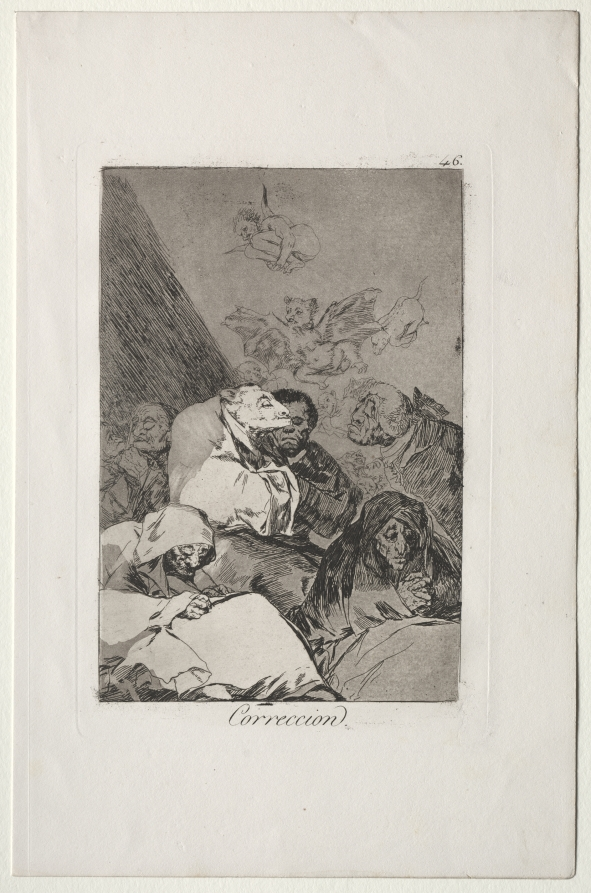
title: Correction, Plate 46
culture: Spain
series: Los Caprichos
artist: Francisco de Goya (Spanish, 1746–1828)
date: 1799 (printed c. 1855)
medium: etching and aquatint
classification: Print